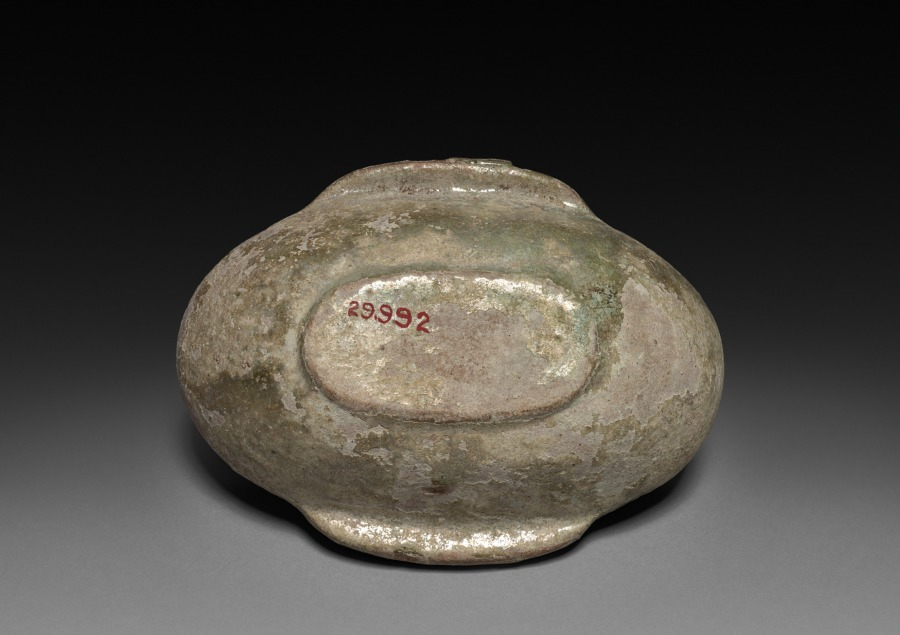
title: Ear Cup (Erbei) for Wine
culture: China, Han dynasty (202 BCE–220 CE)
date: 206 BCE–220 CE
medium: lead glazed earthenware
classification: Ceramic